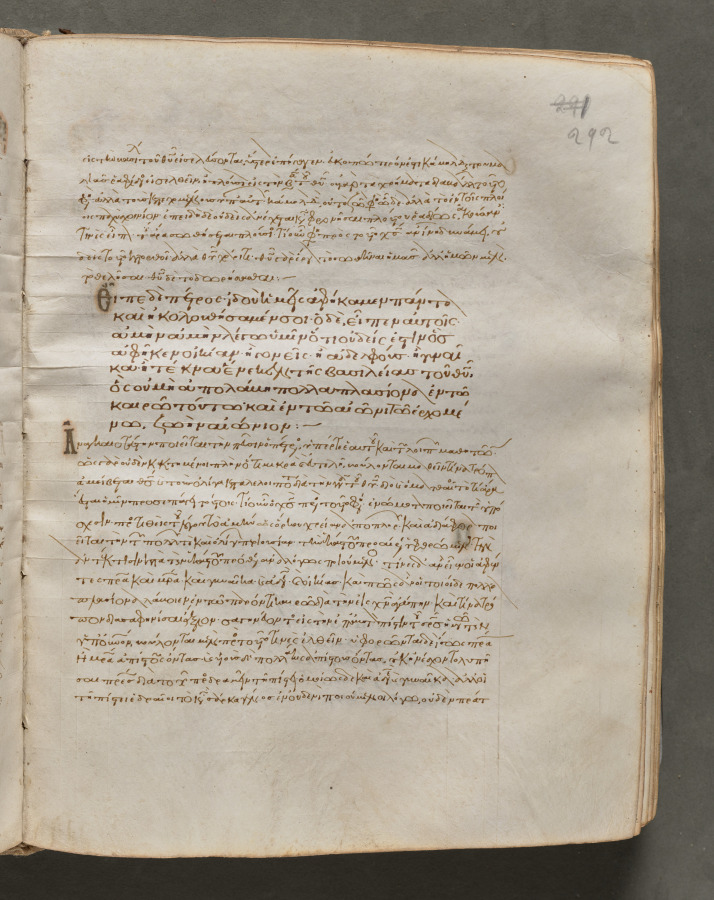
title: Text, folio 292 (recto), from a Gospel Book with Commentaries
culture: Byzantium, Constantinople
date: c. 1000–1100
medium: ink, tempera, and gold on vellum; leather binding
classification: Bound Volume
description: Each of the four gospels in this book opens on a page with brilliantly illuminated borders depicting the author of the text as well as birds—principally peacocks, symbols of the immortality of the soul—and fountains, representing the fountain of life and the salvation of the soul. This volume consists of 428 leaves with texts in Greek. Its level of sophistication suggests that it was probably written and decorated in a monastery in Constantinople.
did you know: Gospel books were carried in procession through Byzantine churches.